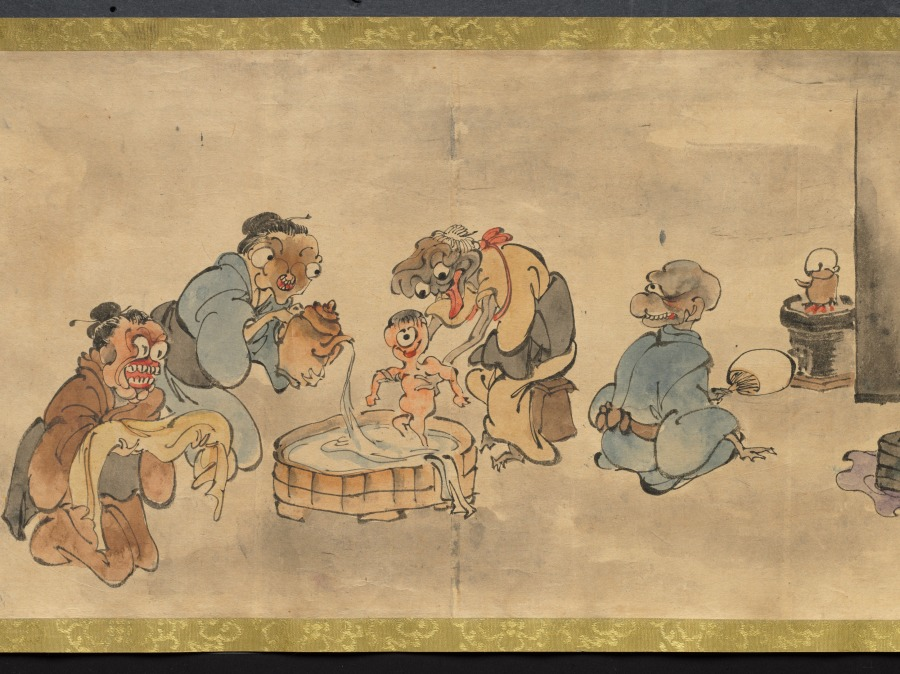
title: An Illustrated Marriage of Apparitions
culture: Japan, Edo period (1615–1868)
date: mid-1800s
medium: handscroll; ink and color on paper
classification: Painting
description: The matchmaking, engagement, wedding, and birth of the first child of two apparitions, or bakemono, literally "things that change," are illustrated in this whimsical, humorous handscroll. Japanese folklore abounds with such strange creatures, most famously represented in handscrolls featuring a procession of 100 supernatural monsters. Aside from a textual preface and cartouches indicating the content of the scenes, the tale is told visually. The artist and whereabouts of the original handscroll are unknown, but a number of other 19th-century copies by amateur painters exist in Japanese collections, attesting to its broad appeal.